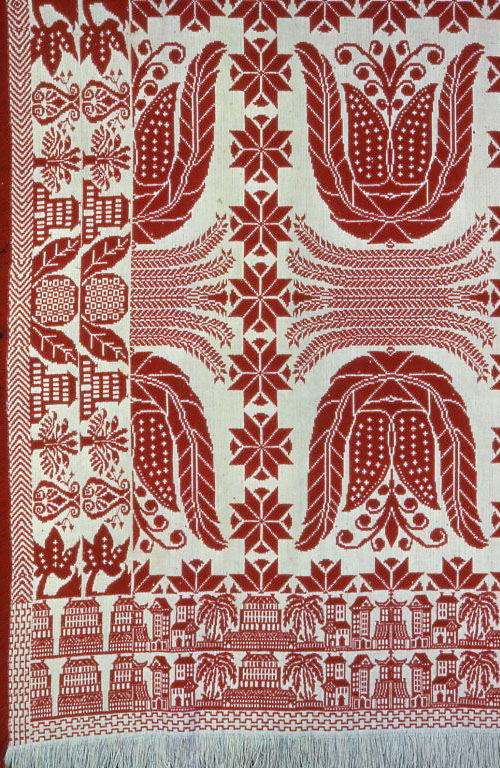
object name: Textile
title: Coverlet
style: 19th century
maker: United States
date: c. 1845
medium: Cotton and wool, plain weave with plain interlacings of secondary binding warp and supplementary patterning wefts; main warp and supplementary weft uncut fringe; (tied double cloth) (Beiderwand); woven on loom with Jacquard attachment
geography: United States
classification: weaving - coverlet; coverlet; textile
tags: boston, tulips, stars, wheat, towns, buildings, trees, coverlet